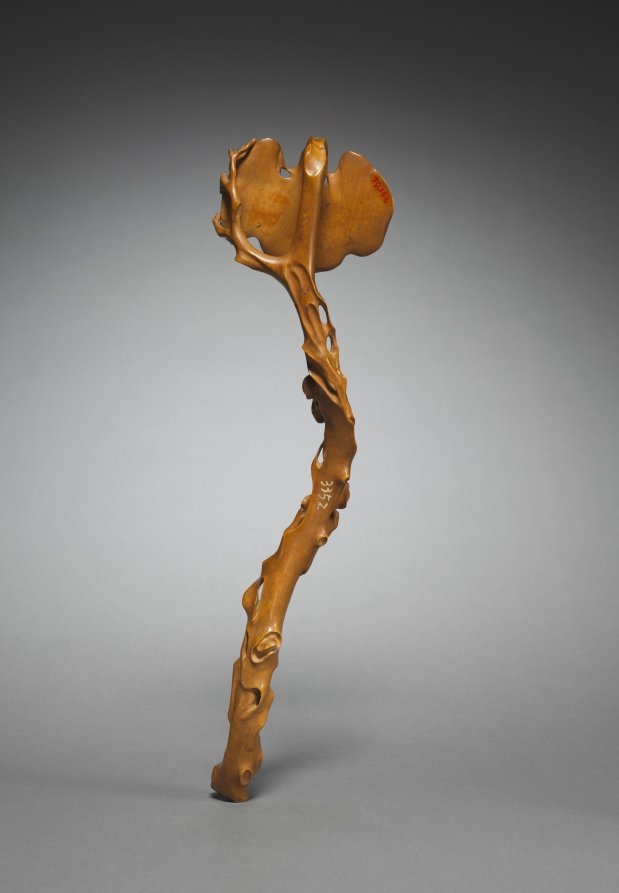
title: Scepter in the Shape of a Ruyi Fungus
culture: China, Qing dynasty (1644-1911)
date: 1700s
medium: carved boxwood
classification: Wood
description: The ruyi scepter was among the decorative items collected by the Chinese literati. It was thought that lofty and refined men of ancient times—the Seven Sages of the Bamboo Grove of the late 200s CE—carried ruyi scepters during the so-called pure conversations of the Daoists. The name ruyi (literally, as one wishes) conveys blessings of wish fulfillment. The fungus-shaped head is an emblem of immortality.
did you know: Boxwood is a small, slow-growing evergreen tree found in Southeast China and as far as Europe.